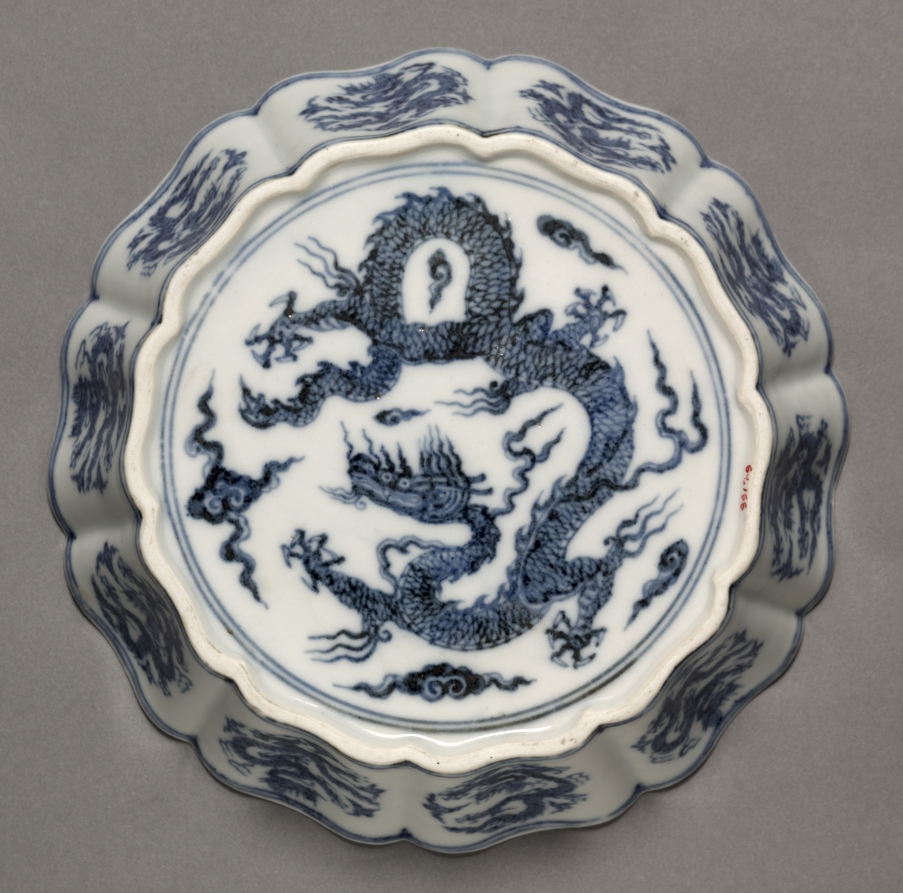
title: Brush Washer with Dragons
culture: China, Jiangxi province, Jingdezhen, Ming dynasty (1368-1644), Xuande reign (1426-35)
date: 1426–35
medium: porcelain with underglaze blue decoration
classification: Ceramic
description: The attractive tonal range found in the painted decoration, resulting from the irregular size of cobalt bits in the pigment, and the pocked glaze surface identify this stunning brush washer as a classic Xuande period piece despite the absence of a reign mark.